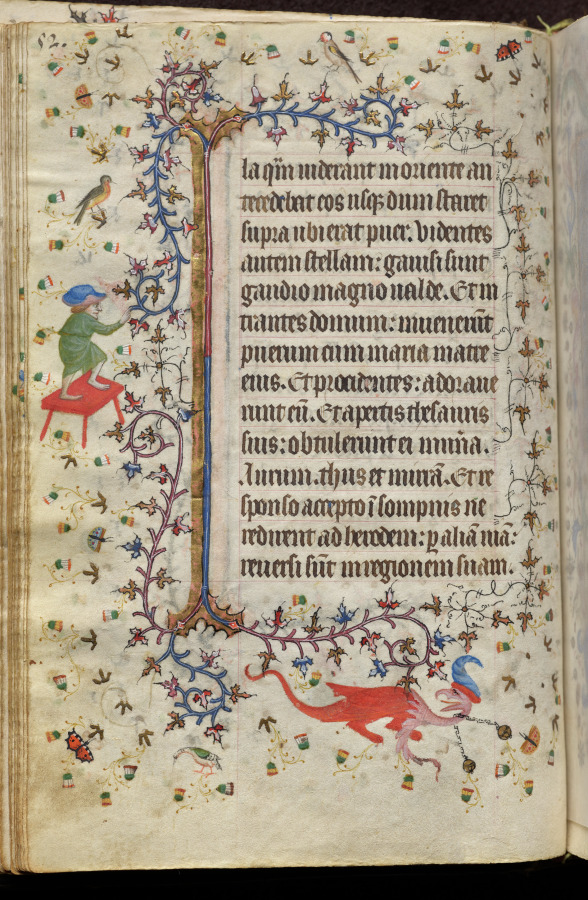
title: Hours of Charles the Noble, King of Navarre (1361-1425): fol. 26v, Text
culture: France, Paris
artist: Master of the Brussels Initials and Associates (French)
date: c. 1405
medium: ink, tempera, and gold on vellum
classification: Bound Volume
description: This precious volume was obviously highly prized by its owner, the French-born King of Navarre, who had his coat of arms painted on no less than twenty folios. Rather than directly commissioning this manuscript from a specific workshop, it seems that Charles the Noble acquired his book of hours -- perhaps ready-made for the luxury market -- while on a trip to Paris in 1404-05. A collaborative effort, six painting styles are evidenced within the pages of this codex, those of two Italians, two Frenchmen, and two Netherlanders. The painter who was responsible for the planning and decoration of the book, and who produced seventeen of the large miniatures, was a Bolognese artist known as the Master of the Brussels Initials. His principal assistant, responsible for most of the borders, was a Florentine who signed his name "Zecho" da Firenze on folio 208 verso.